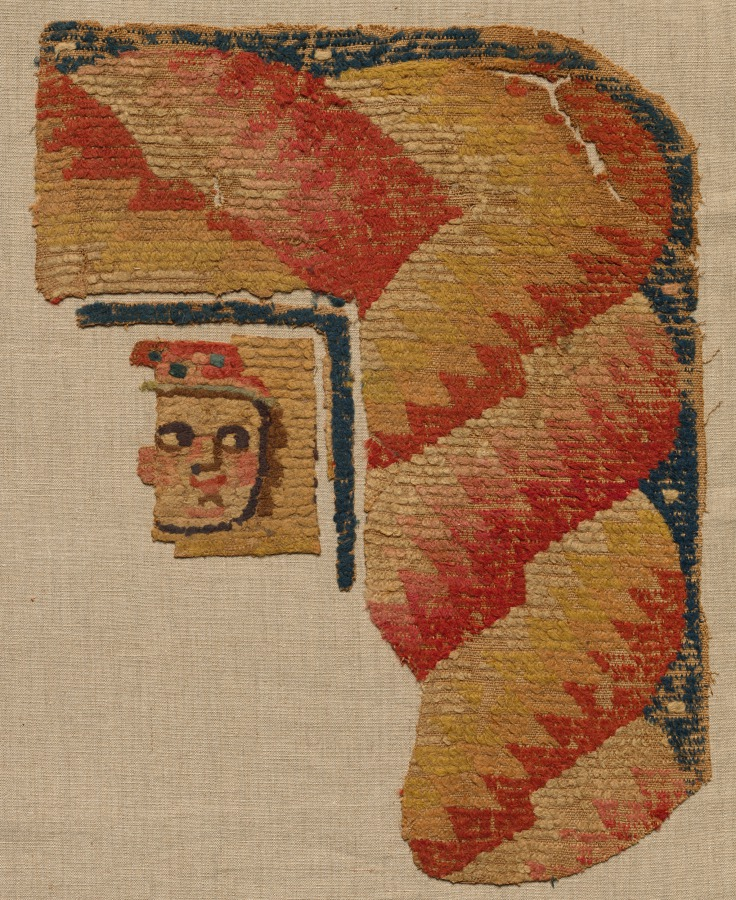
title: Fragment, Probably an Ornament from a Large Curtain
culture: Egypt, Byzantine period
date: late 400s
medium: looped-weft weave; linen and wool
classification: Textile